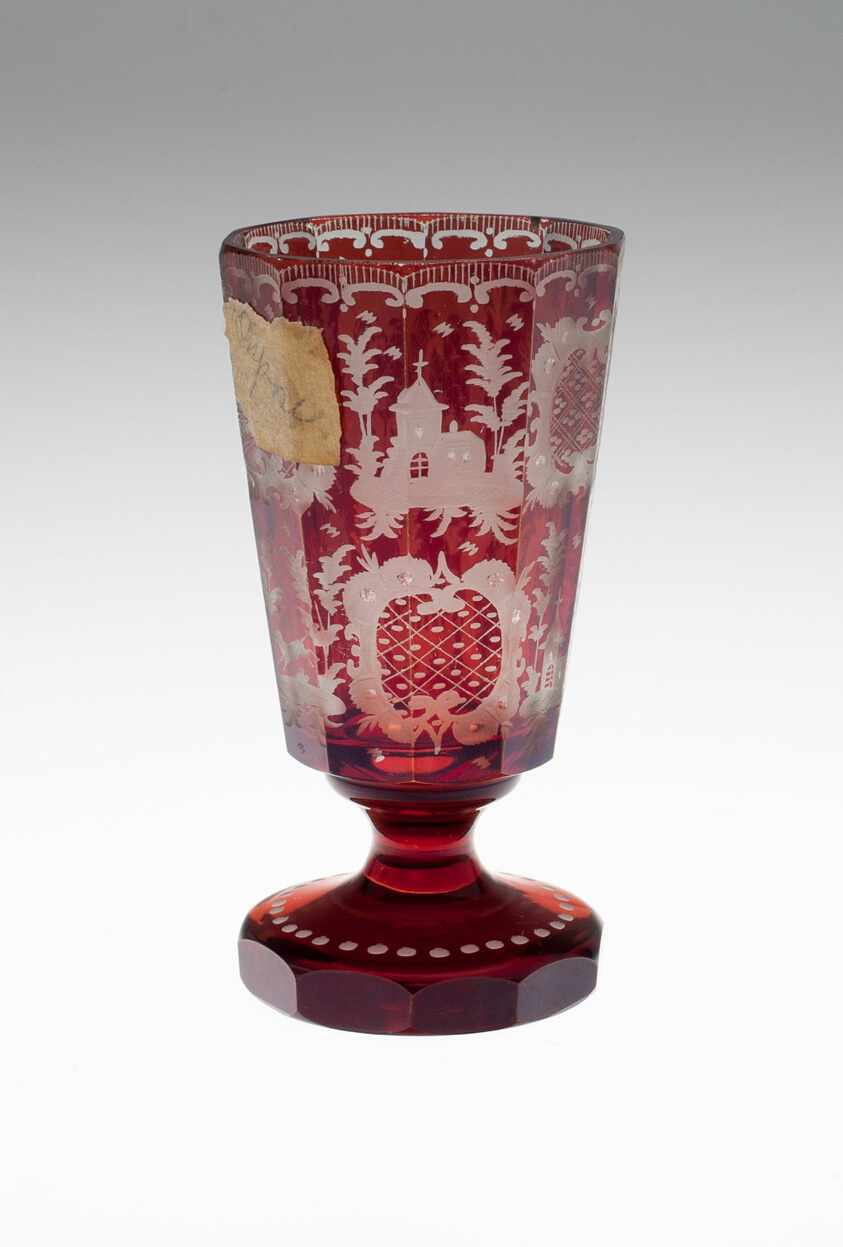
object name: Glass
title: Wine Glass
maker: Bohemia, Czech Republic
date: c. 1850/80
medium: Glass; blown, cut, stained red and engraved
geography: Bohemia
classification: drinking vessel; glass; european decorative arts